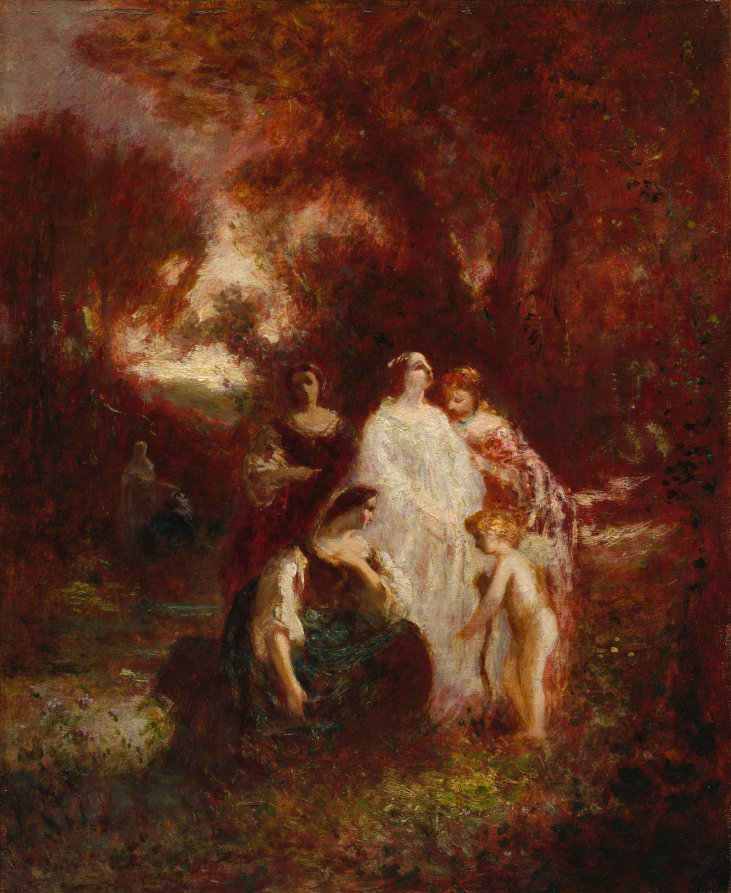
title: Figures in the Woods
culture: France, 19th century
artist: Adolphe Monticelli (French, 1824–1886)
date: c. 1857–1862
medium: oil on fabric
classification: Painting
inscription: Signed lower left: Monticelli